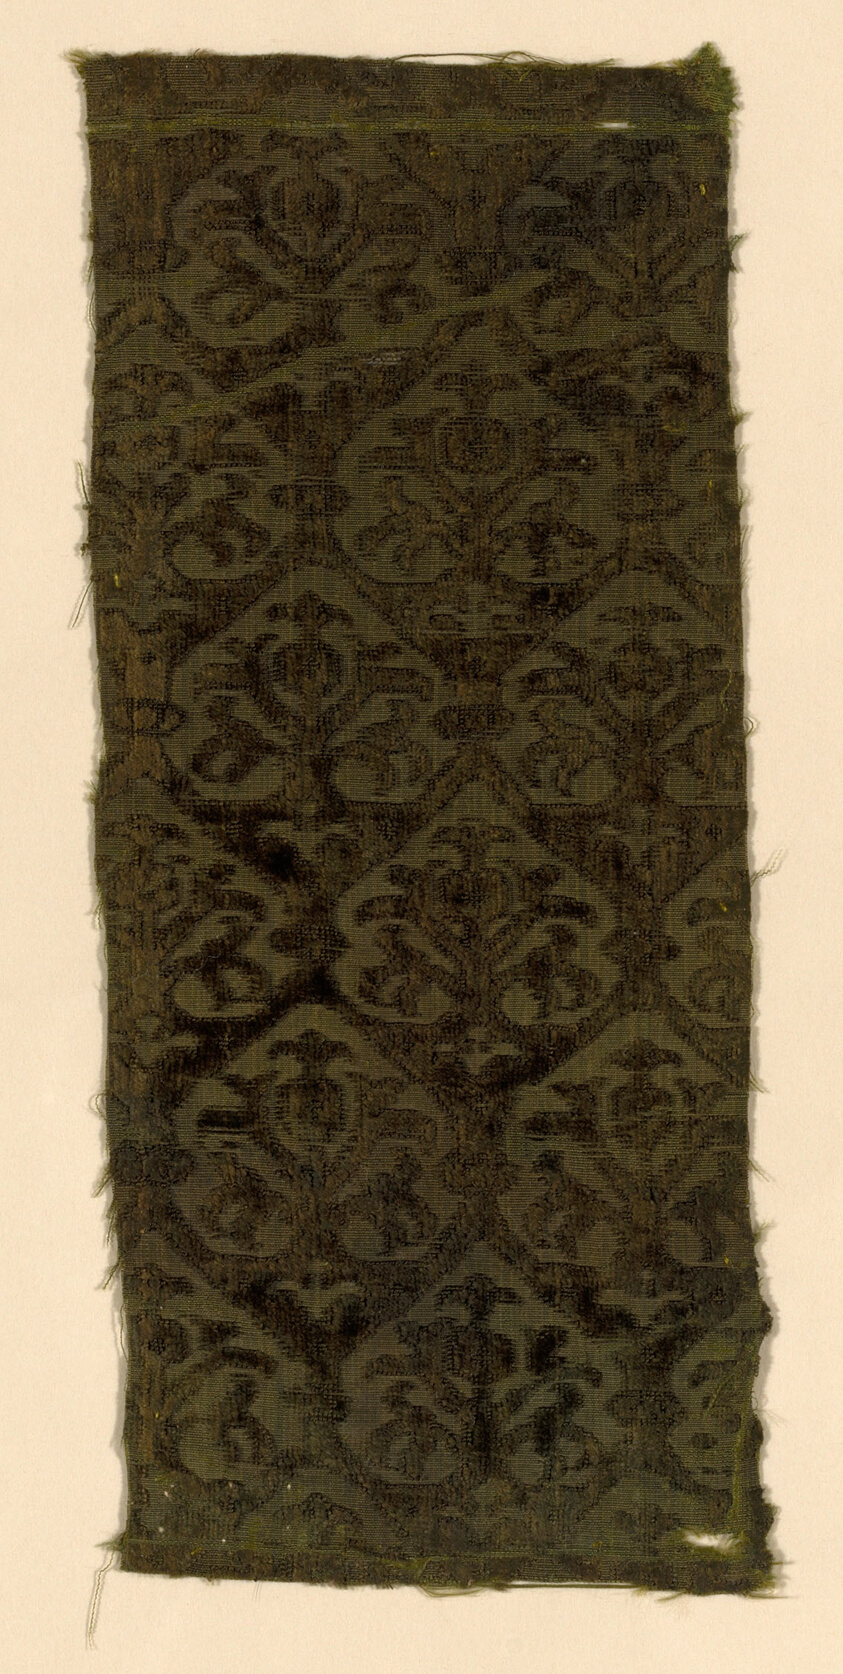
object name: Textile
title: Fragment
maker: Italy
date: 1575/1600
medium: Silk, plain weave with supplementary pile warps forming cut and uncut voided velvet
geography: Italy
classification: textile; weaving - velvet